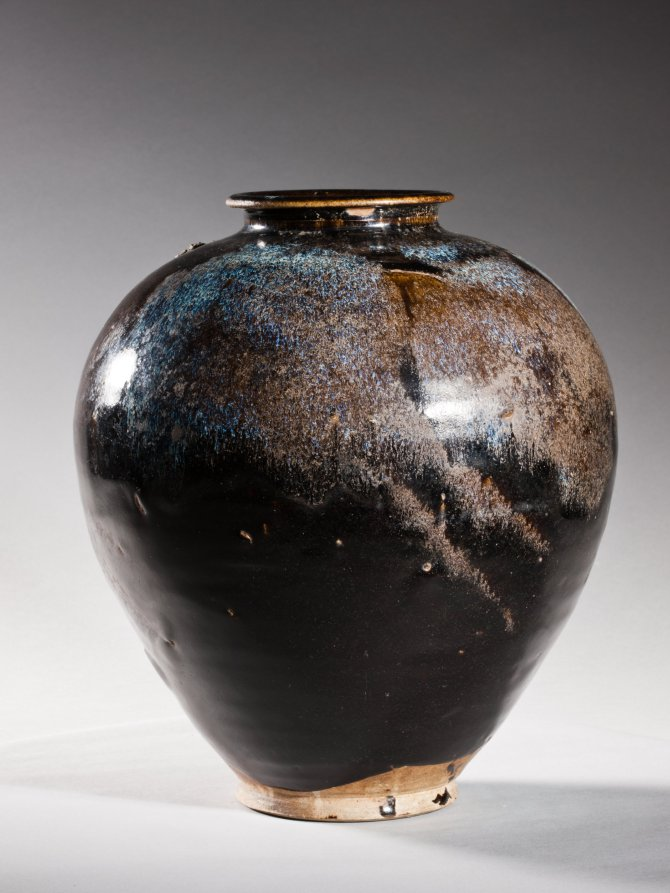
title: Jar: Black Ware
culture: China, Henan province, Huangdao kilns, Tang dynasty (618-907)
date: 700s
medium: glazed stoneware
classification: Ceramic